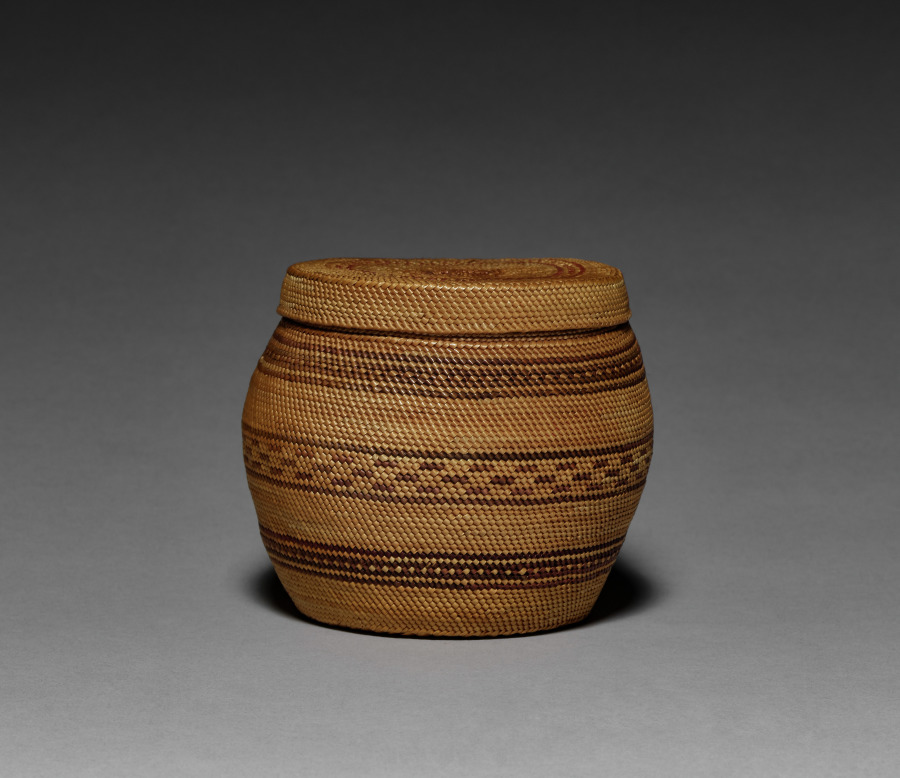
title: Covered Bowl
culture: Northwest Coast, Vancouver Island, late 19th century (?)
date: c. 1875–1900?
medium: twined grass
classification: Basketry